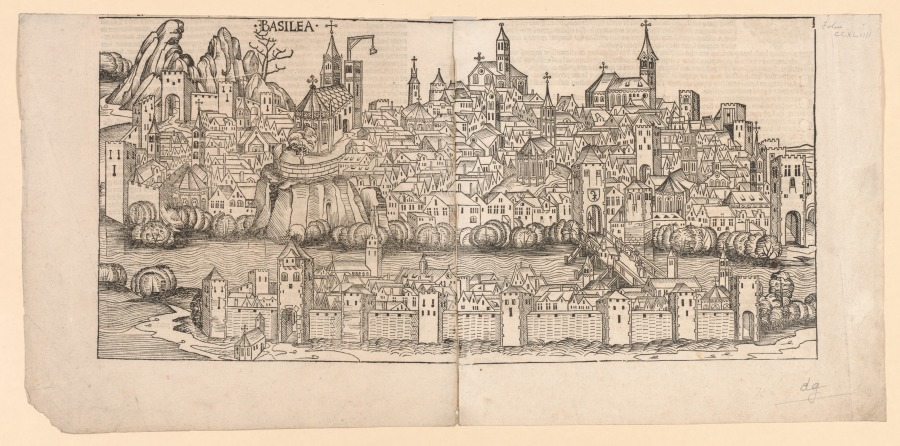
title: Nuremberg Chronicle: Topographical View of Basle, Switzerland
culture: Germany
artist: Michael Wolgemut (German, 1434–1519)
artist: and Wilhelm Playdenwurff (German, 1494)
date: 1493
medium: woodcut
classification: Print